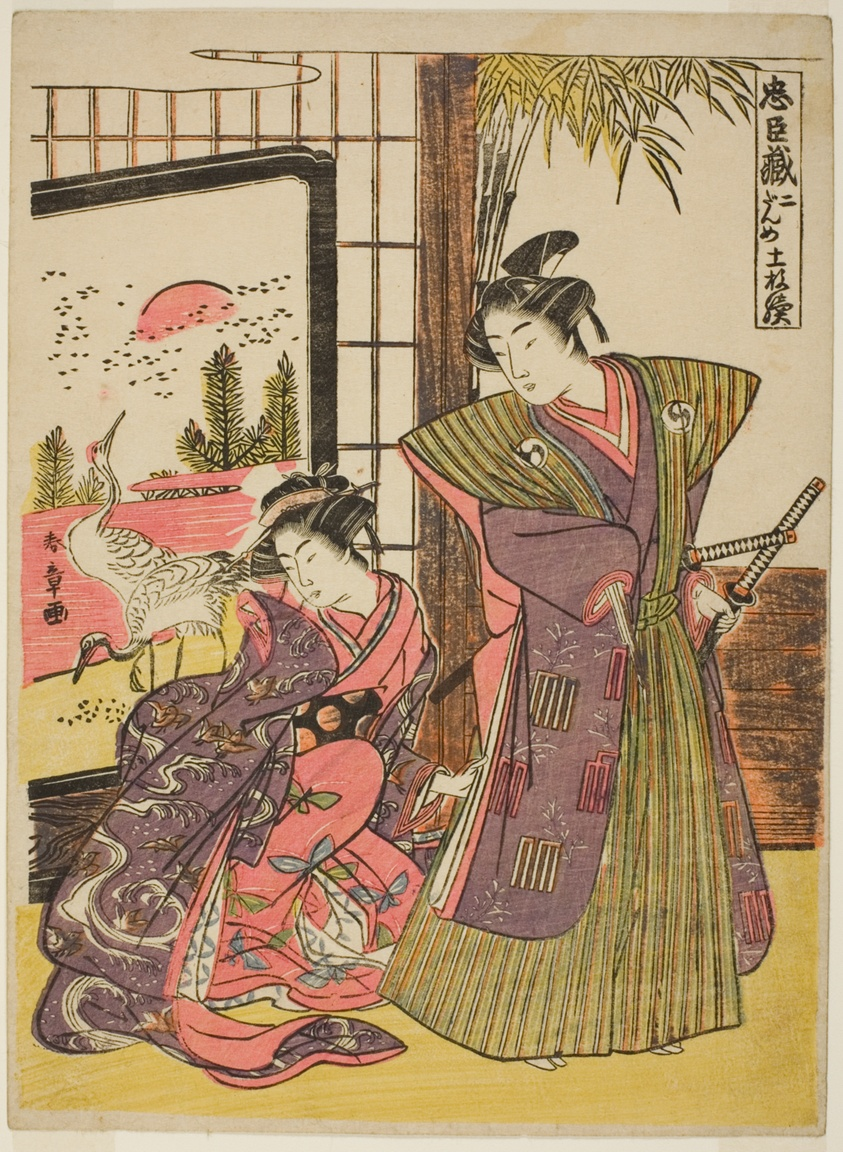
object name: Print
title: Act Two: The House of Kakogawa Honzo from the play Chushingura (Treasury of Loyal Retainers)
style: Japanese (culture or style)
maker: Katsukawa Shunsho 勝川 春章; Japanese, 1726-1792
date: c. 1779/80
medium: Color woodblock print; chuban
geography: Japan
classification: woodblock print; print; asian art